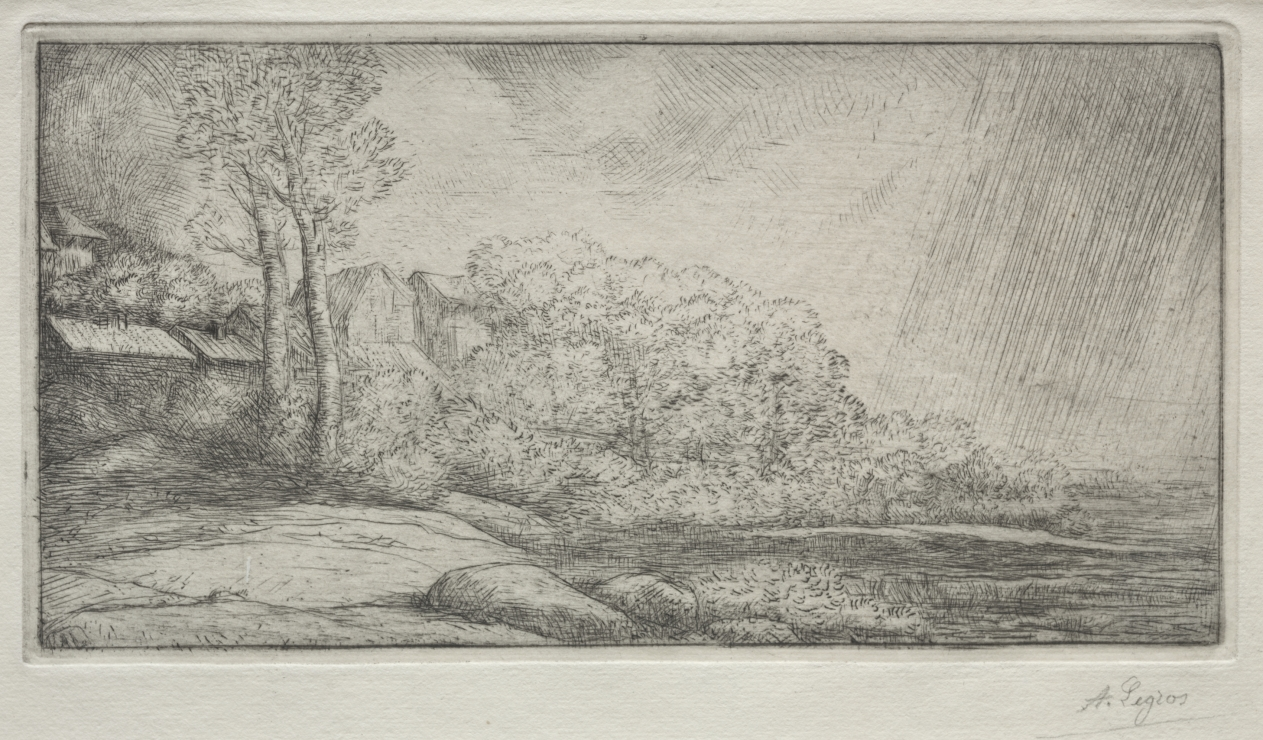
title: Landscape with Two Trees (Paysage aux deux Arbres)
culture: France, 19th century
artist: Alphonse Legros (French, 1837–1911)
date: c. 1857–1911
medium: drypoint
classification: Print